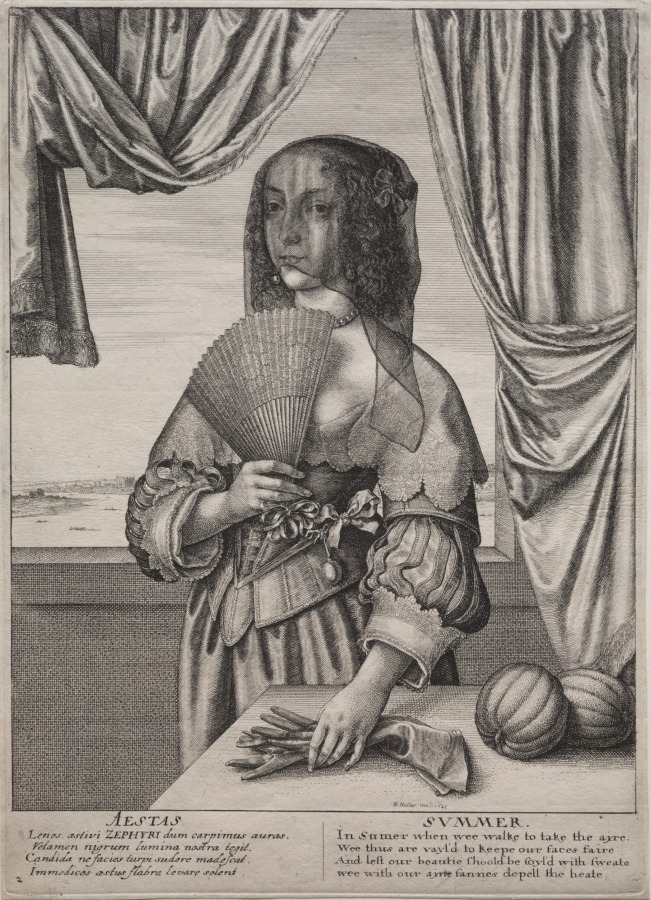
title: The Four Seasons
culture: Bohemia, 17th century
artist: Wenceslaus Hollar (Bohemian, 1607–1677)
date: 1641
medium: etching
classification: Print